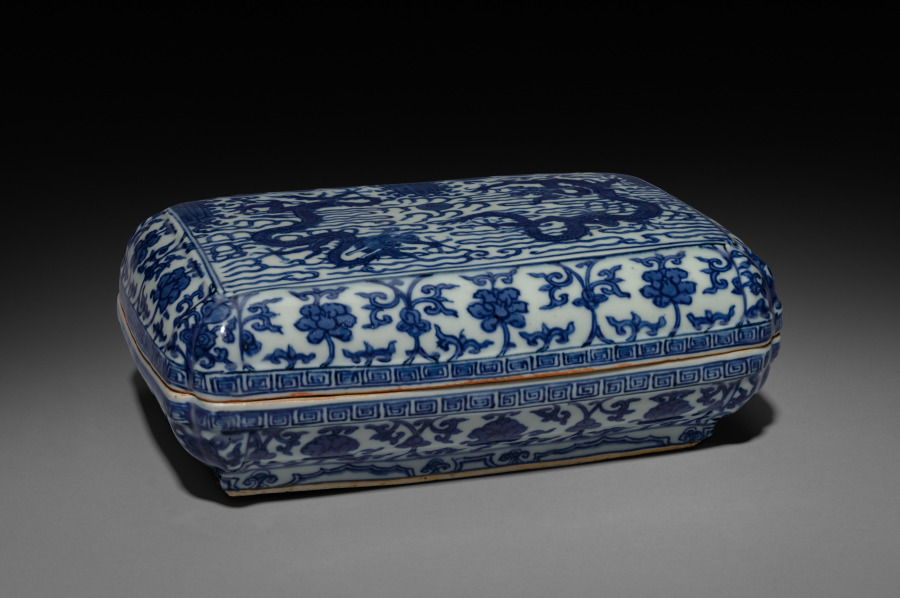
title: Covered Box with Dragons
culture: China, Jiangxi province, Jingdezhen kilns, Ming dynasty (1368-1644), Wanli reign (1572-1620)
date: 1573–1620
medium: porcelain with underglaze blue decoration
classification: Ceramic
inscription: 大明萬曆年製